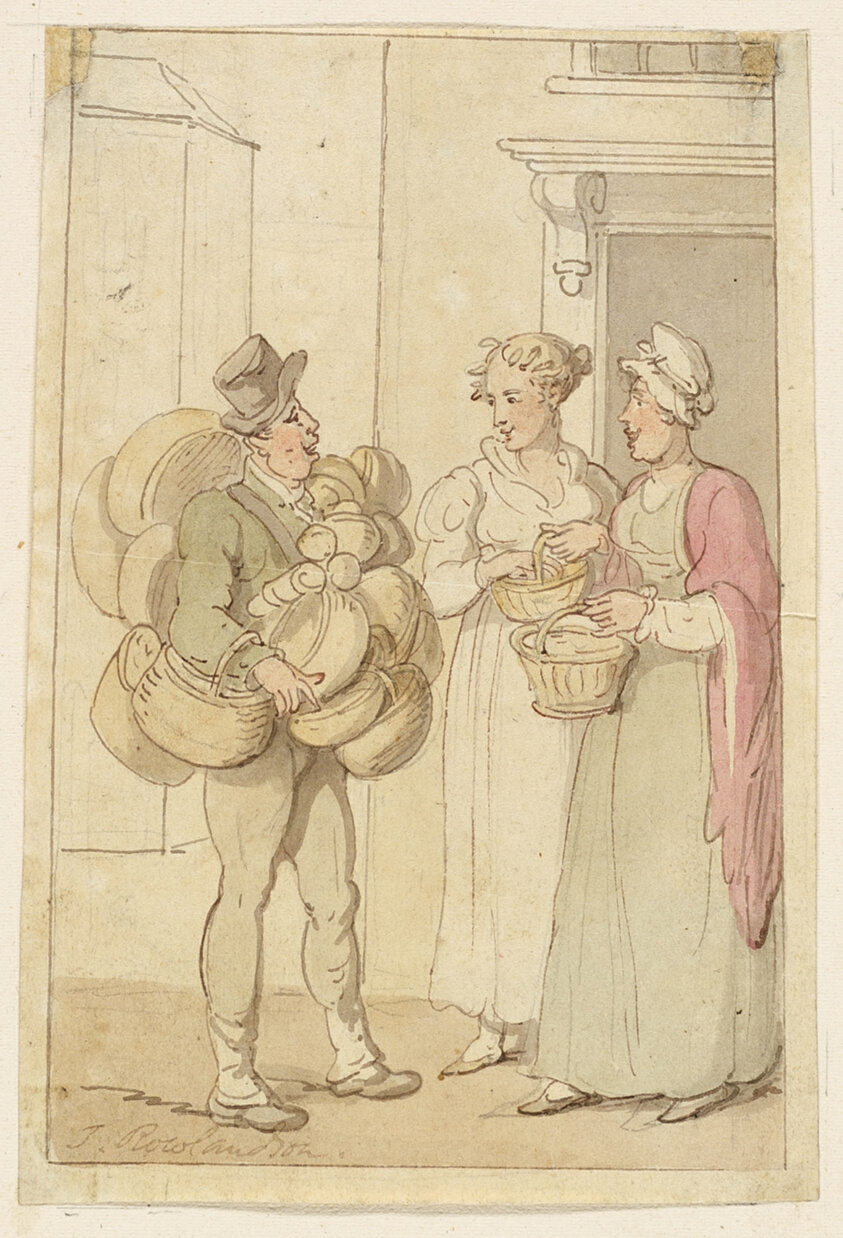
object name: Drawing and Watercolor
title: The Basket Seller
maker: Thomas Rowlandson (English, 1756-1827)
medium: Pen and brown ink with brush and watercolor, over graphite, on ivory wove paper, tipped onto ivory wove paper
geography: England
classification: watercolor; drawings (visual works); prints and drawing